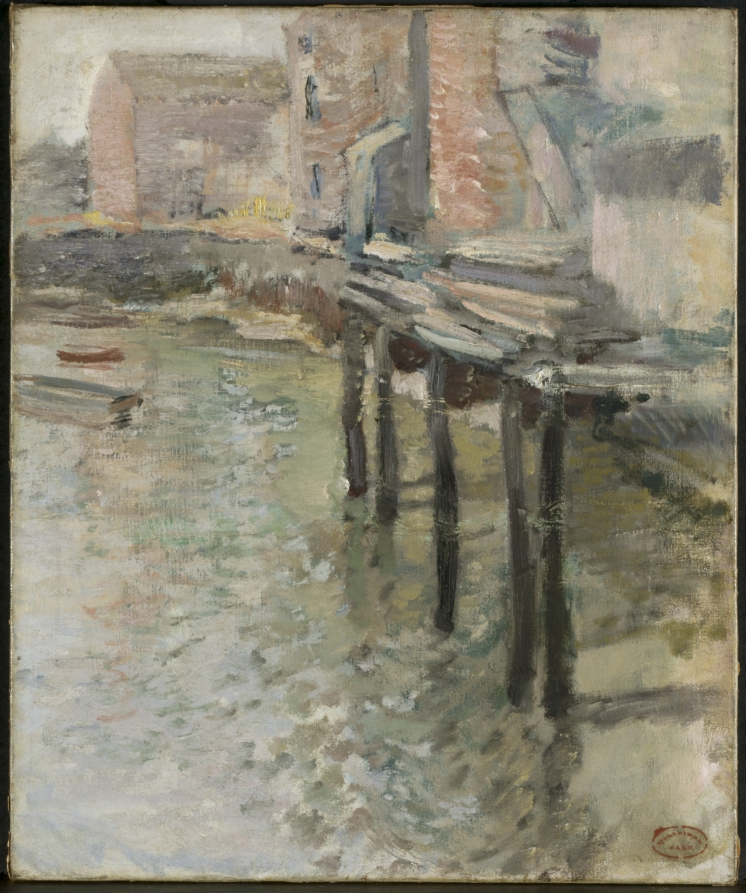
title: Deserted Wharf (The Old Mill at Cos Cob)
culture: America, late 19th Century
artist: John Henry Twachtman (American, 1853–1902)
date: before 1899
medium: oil on canvas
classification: Painting